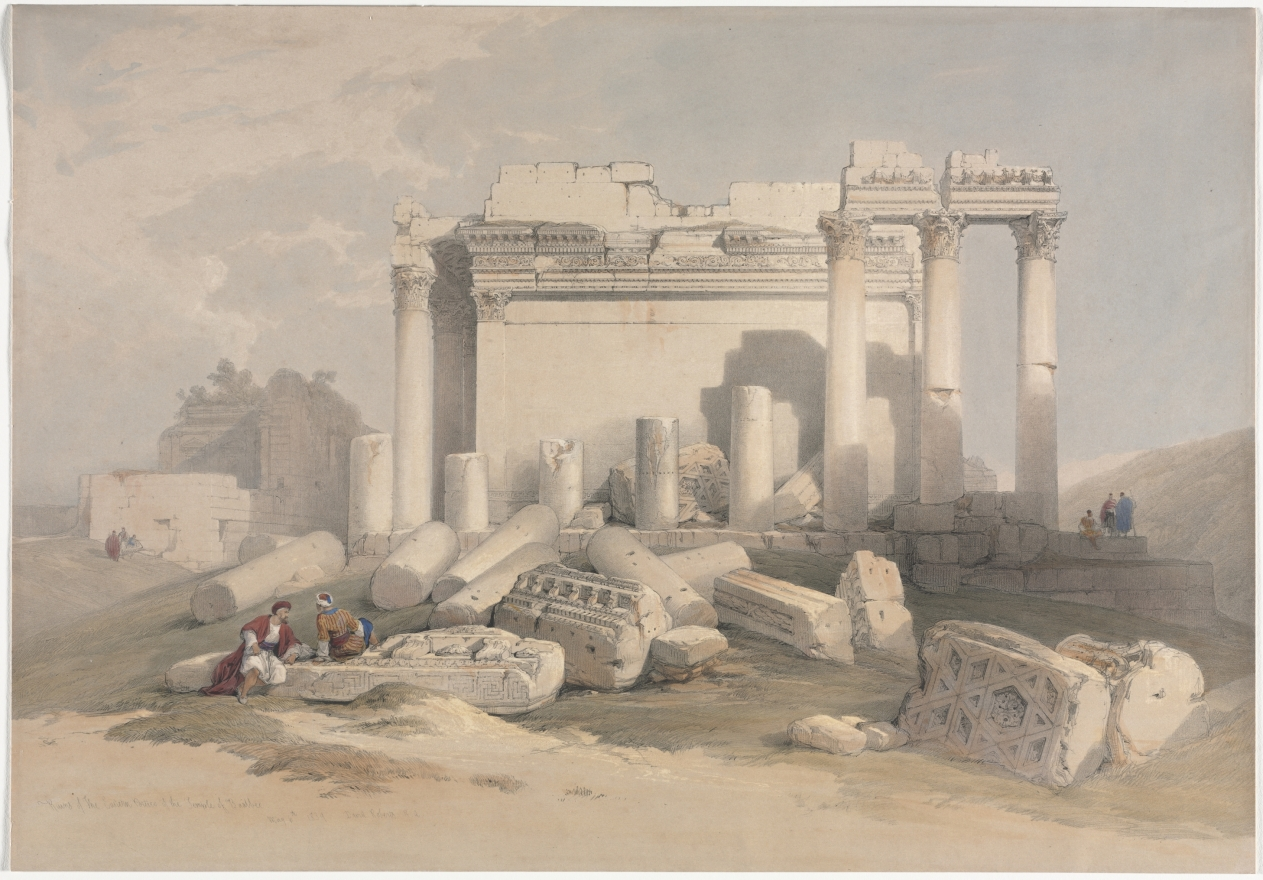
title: Ruins of the Eastern Portico of the Temple of Baalbec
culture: England, 19th century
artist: David Roberts (Scottish, 1796–1864)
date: 1839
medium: color lithograph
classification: Print